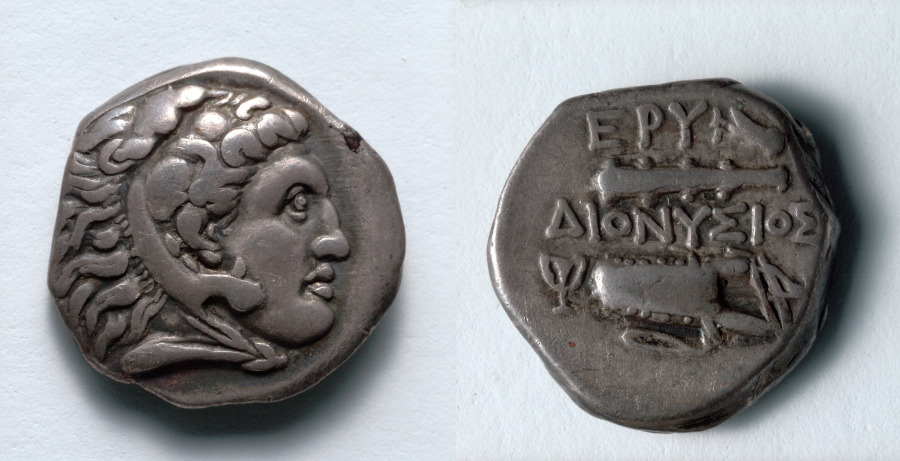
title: Drachm: Head of Herakles (obverse); Club, Bow Case (reverse)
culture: Greek, minted at Erythrai (Ionia)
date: 387–300 BCE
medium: silver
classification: Coins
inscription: ΕΡΥ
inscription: ΔΙΟΝΥΣΙΟΣ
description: One of many city-states to include the hero Herakles–here shown beardless and wearing his lion-skin–on its coinage, Erythrae lies on the Ionian coast, near the island of Chios. The reverse features the inscriptions ΕΡΥ (for Erythrae) and ΔΙΟΝΥΣΙΟΣ, likely the name of a magistrate. Also present are a small owl and kantharos (wine cup), plus the club and bow case of Herakles.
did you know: The hero Herakles appears on coinage from city-states across the Greek world.